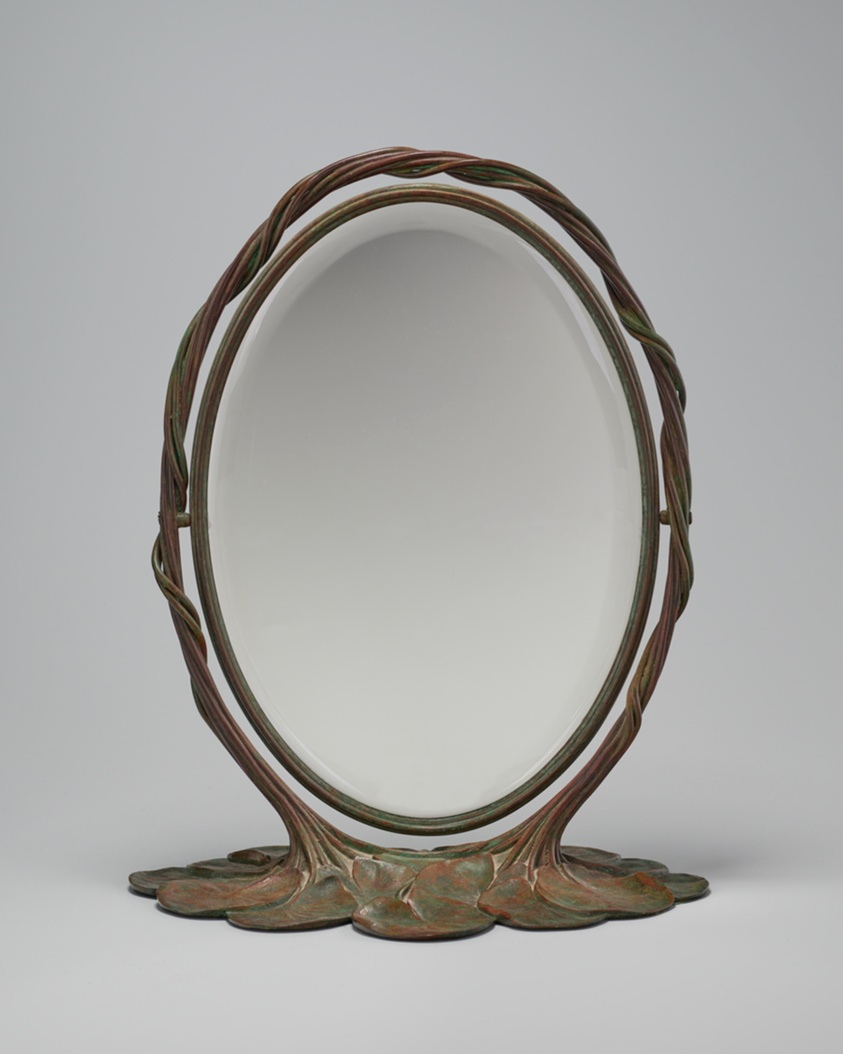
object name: Furnishings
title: “Pond Lily” Mirror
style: Arts and Crafts Movement, 20th Century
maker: Tiffany Studios (American, 1902–32); Corona, New York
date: c. 1905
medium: Bronze and mirrored glass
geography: Corona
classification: dresser mirror; american decorative arts; decorative arts; flat mirrors; mirror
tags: Nymphaea, pond lily, pond, water lilies